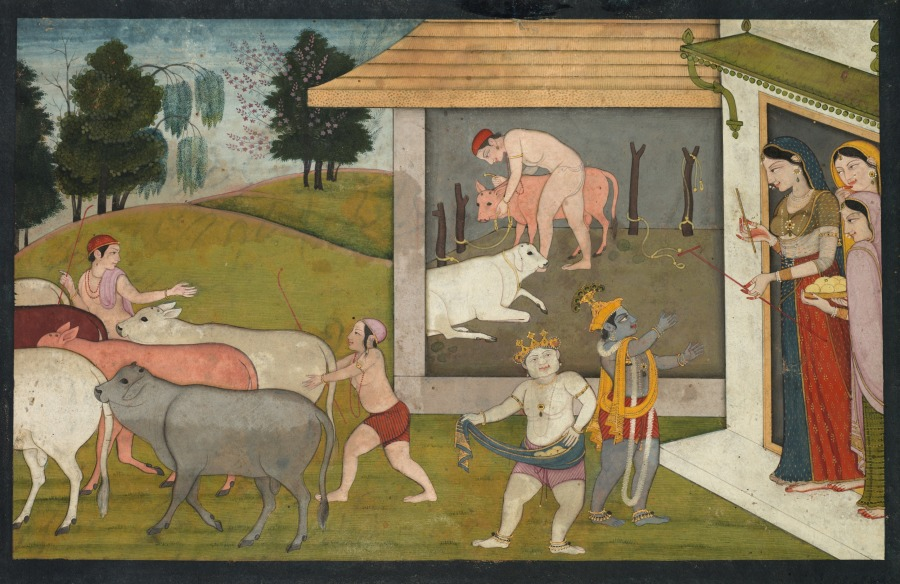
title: Krishna and Balarama taking the cattle out to graze, from a Bhagavata Purana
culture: Northern India, Pahari kingdoms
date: c. 1780–90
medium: Gum tempera, ink, and gold on paper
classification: Painting